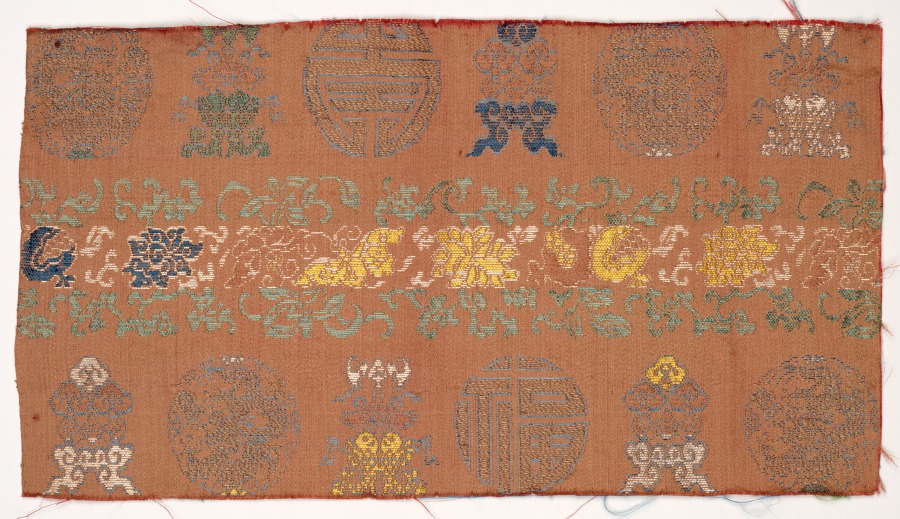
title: Fragment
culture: China, 19th century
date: 1800s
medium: silk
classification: Textile